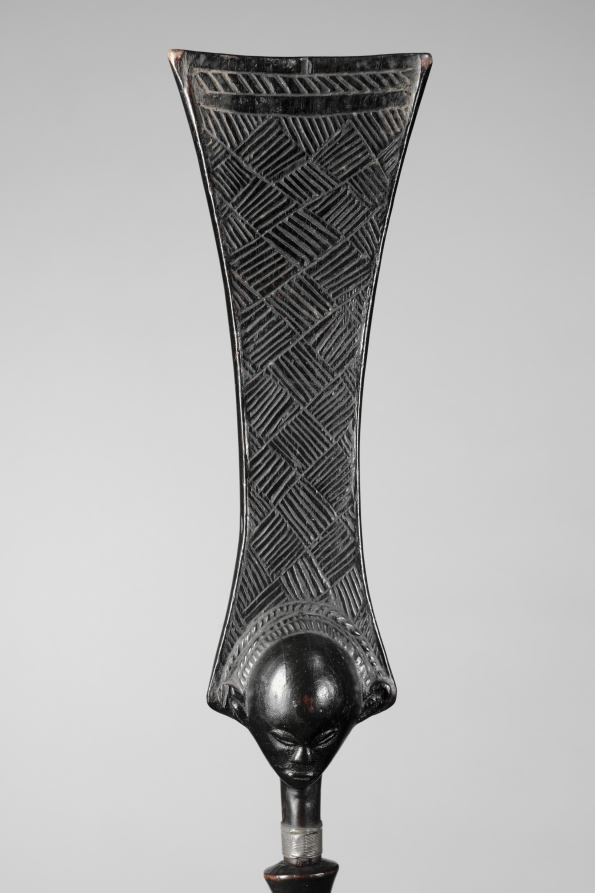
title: Staff of Office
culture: Central Africa, Democratic Republic of the Congo, Luba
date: early to mid-1800s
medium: Wood and iron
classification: Sculpture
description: Sanctified by a ritual specialist and enhanced with medicinal substances, the staff possessed supernatural qualities and was endowed with healing power. Luba staffs are among the most important regalia of Luba kings. The metal point alludes to the kingdom's stability and durability. Each staff has its own distinctive iconography to reflect regional styles. As Chief Msidi (former owner of this staff) ruled over the Yeke kingdom (and not the Luba kingdom), it begs the question of how he acquired this symbol of another realm's power.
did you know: The Yeke kingdom ruler Chief Msidi gave this as a gift of appreciation to the British missionary Frederick Stanley Arnot, whom the chief had invited to his kingdom.